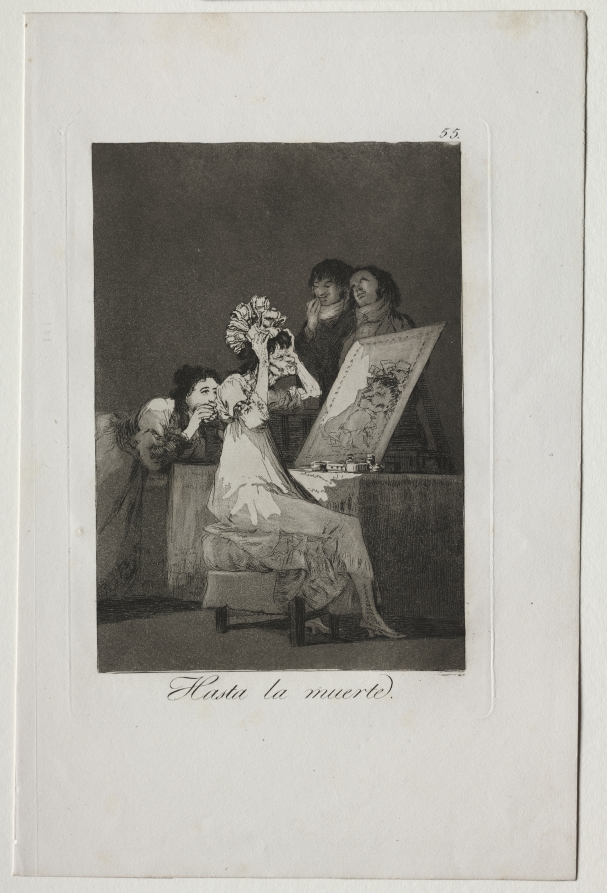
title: Until Death, Plate 55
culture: Spain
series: Los Caprichos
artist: Francisco de Goya (Spanish, 1746–1828)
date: 1799 (printed c. 1855)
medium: etching and aquatint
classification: Print